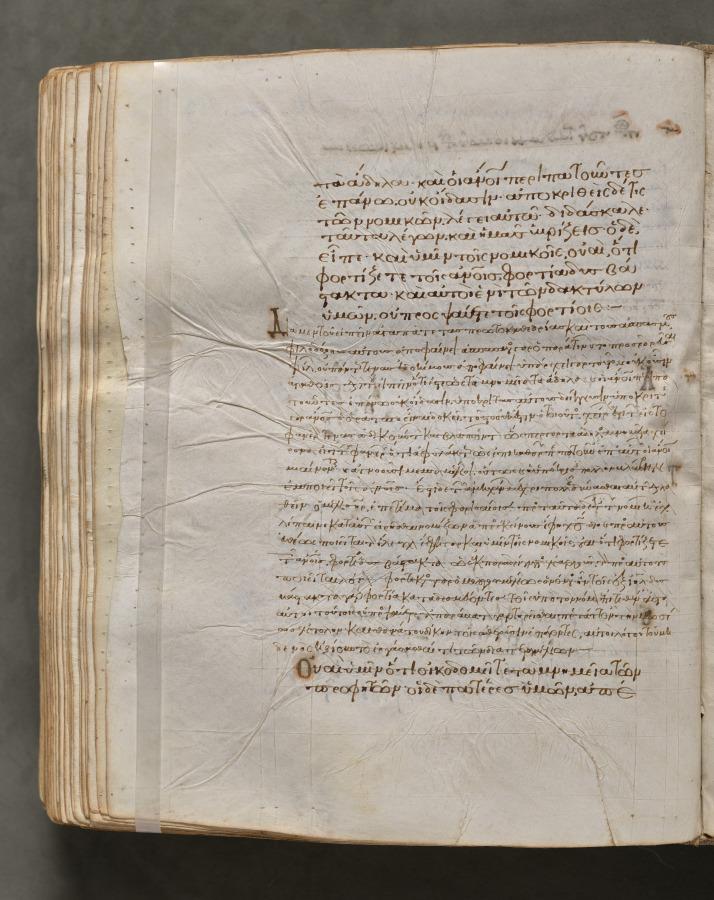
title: Text, folio 263 (verso), from a Gospel Book with Commentaries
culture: Byzantium, Constantinople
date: c. 1000–1100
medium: ink, tempera, and gold on vellum; leather binding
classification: Bound Volume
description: Each of the four gospels in this book opens on a page with brilliantly illuminated borders depicting the author of the text as well as birds—principally peacocks, symbols of the immortality of the soul—and fountains, representing the fountain of life and the salvation of the soul. This volume consists of 428 leaves with texts in Greek. Its level of sophistication suggests that it was probably written and decorated in a monastery in Constantinople.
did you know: Gospel books were carried in procession through Byzantine churches.